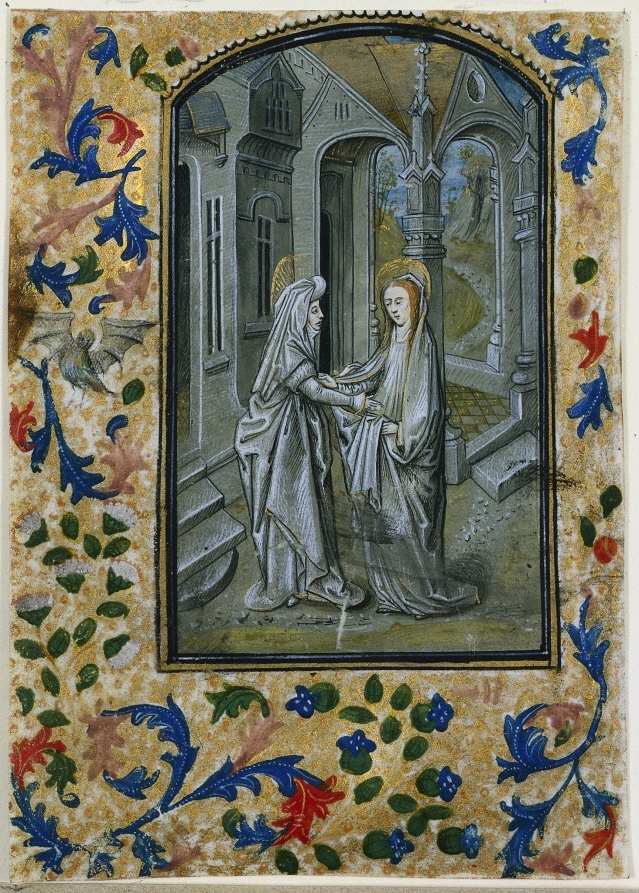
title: Leaf from a Book of Hours: The Visitation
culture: Flanders, Bruges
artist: Guillaume Vrelant (Flemish, c. 1454–1481)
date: c. 1470–1480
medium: tempera, liquid gold, and grisaille on vellum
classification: Manuscript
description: Guillaume Vrelant, born in Utrecht, was known to be in Bruges from 1454 onward where he died around 1481. He probably went there to sidestep a 1427 law which banned the sale of Utrecht images. A painter very much in vogue, he founded the Illuminators’ Guild in Bruges under the patronage of Saint John the Evangelist. He is known to have provided manuscripts to the Burgundian court.